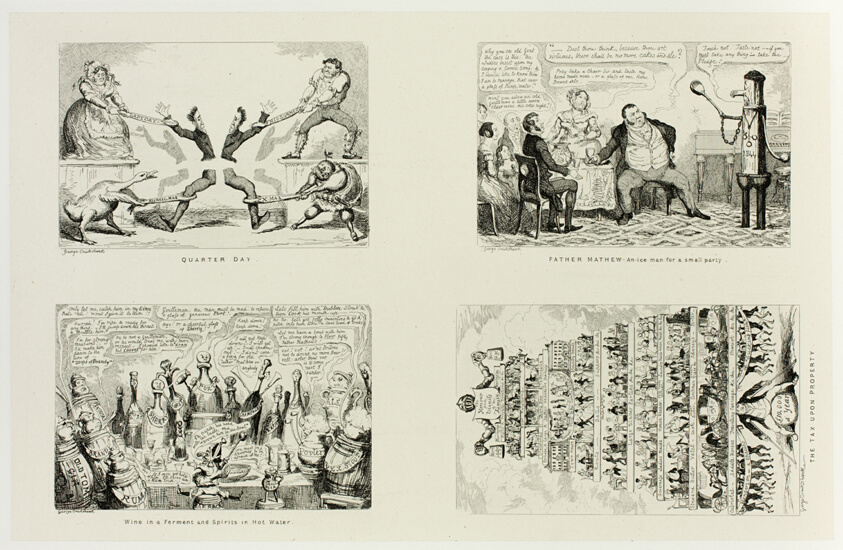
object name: Print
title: Quarter Day from George Cruikshank's Steel Etchings to The Comic Almanacks: 1835-1853 (top left)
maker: George Cruikshank (English, 1792-1878); published by Pickering & Chatto (English, 19th century)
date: 1844, printed c. 1880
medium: Four steel etchings in black on cream India paper, laid down on off-white card (chine collé)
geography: England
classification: etching; paper; print; prints and drawing